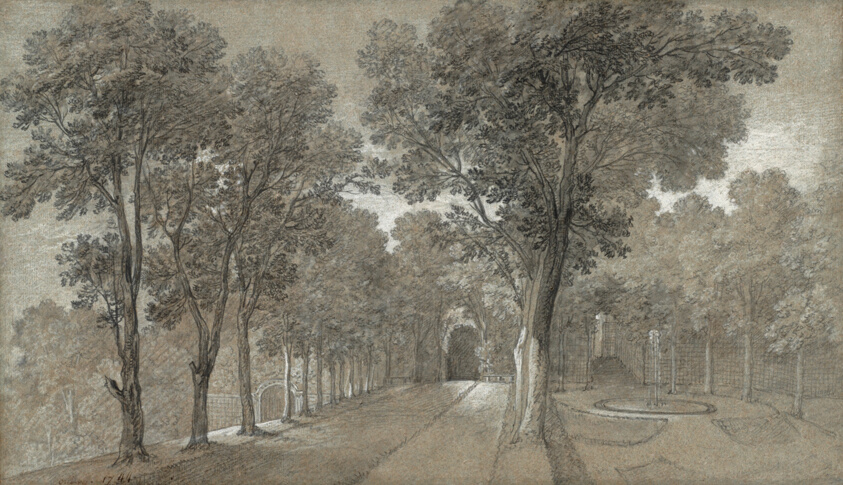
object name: Drawing and Watercolor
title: View of the Park at Arcueil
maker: Jean-Baptiste Oudry (French, 1686-1755)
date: 1744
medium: Black chalk with white chalk and charcoal, on gray laid paper with blue fibers, laid down on cream card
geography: France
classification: chalk; drawings (visual works); prints and drawing